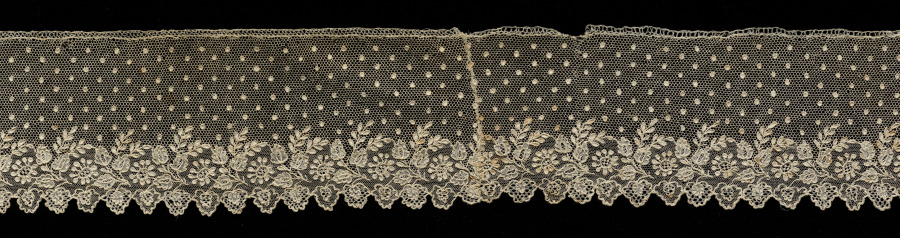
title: Lace Edging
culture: France, Alençon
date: 1700s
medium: Linen: needle lace (Point d'Alençon)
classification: Lace